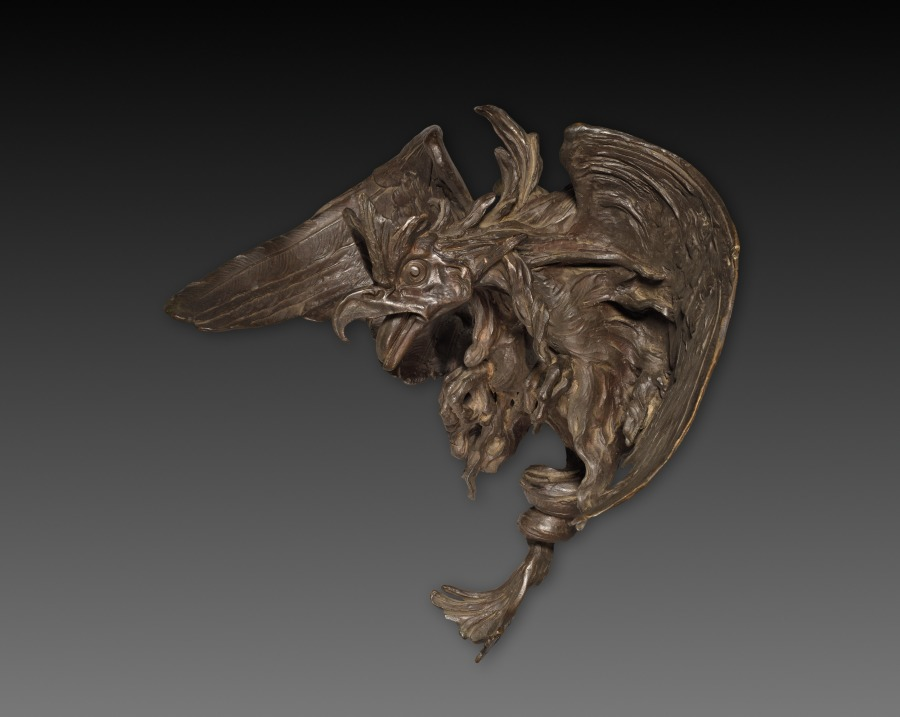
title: Wild Basilisk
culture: Germany, 19th century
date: 1800s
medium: bronze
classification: Sculpture